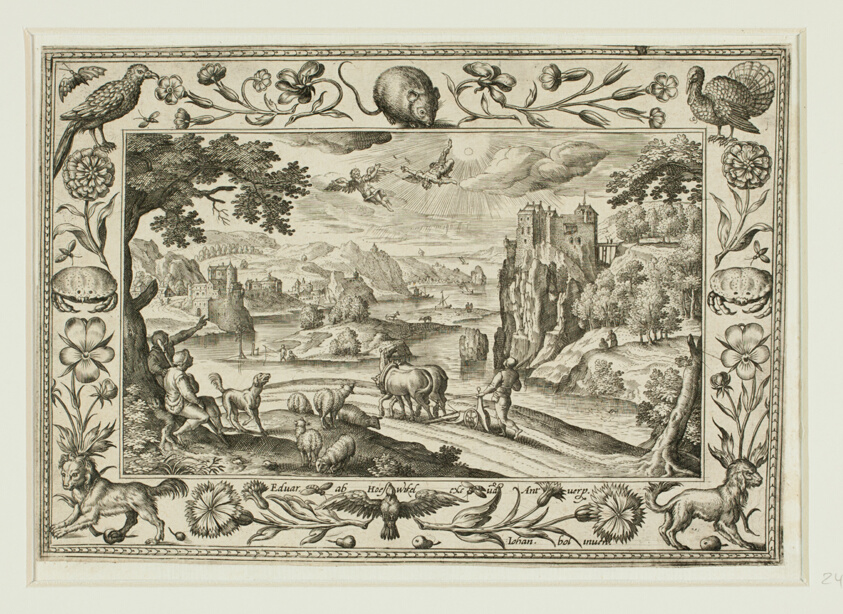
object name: Print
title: The Fall of Icarus, from Landscapes with Old and New Testament Scenes and Hunting Scenes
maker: Adriaen Collaert (Flemish, c. 1560–1618); after Hans Bol (Flemish, 1535–1593); published by Anna van Hoeswinckel (Flemish)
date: 1584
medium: Engraving in black on cream laid paper, laid down on cream laid paper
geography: Flanders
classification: engraving; paper; print; prints and drawing